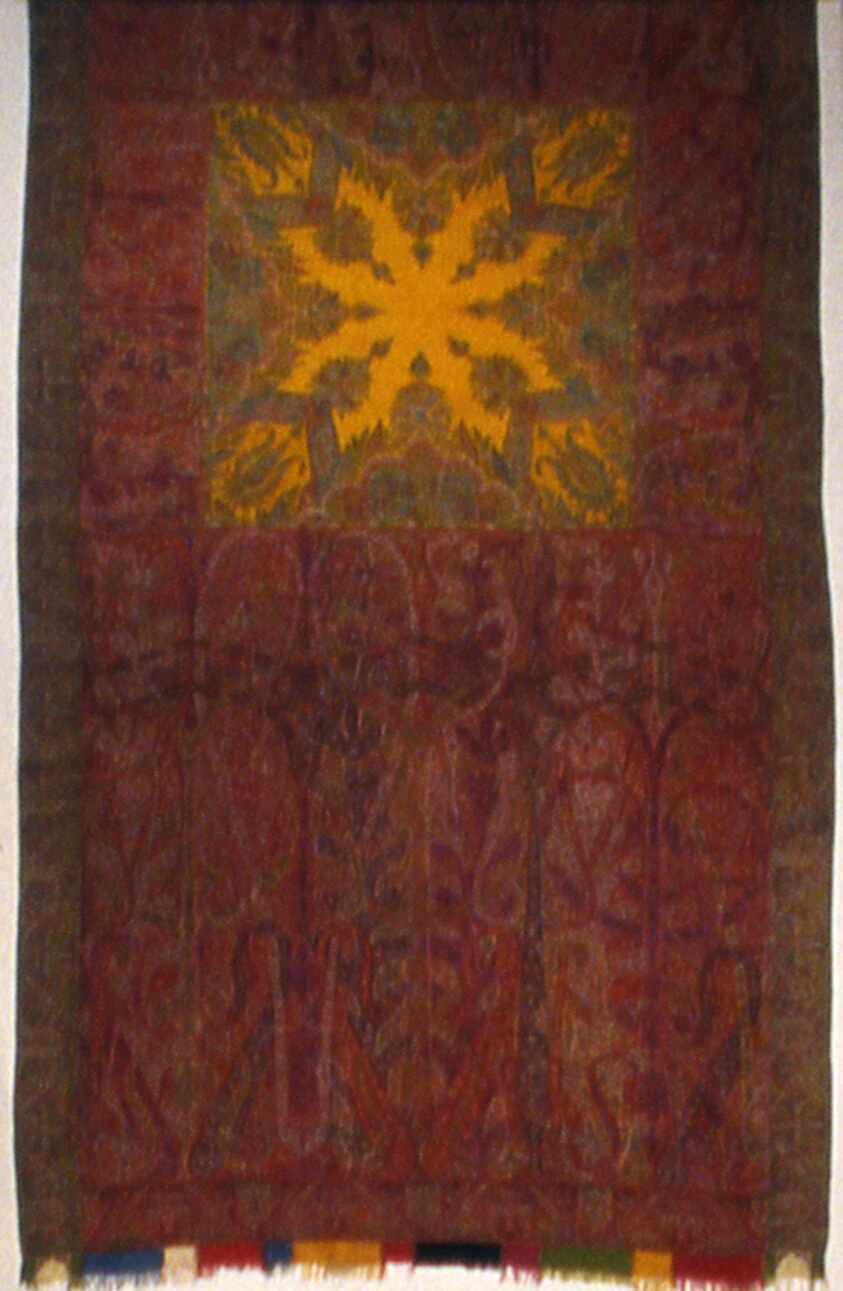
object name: Textile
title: Long Shawl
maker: India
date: 1840/45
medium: Wool, double interlocking 2:2 twill tapestry weave, woven in rectangular sections; attached "Harlequin" tabs of pieced 2:2 twill weaves; embroidered in overcast, stem, and surface satin stitches; laid work and couching; main warp fringe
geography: India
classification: textile; weaving